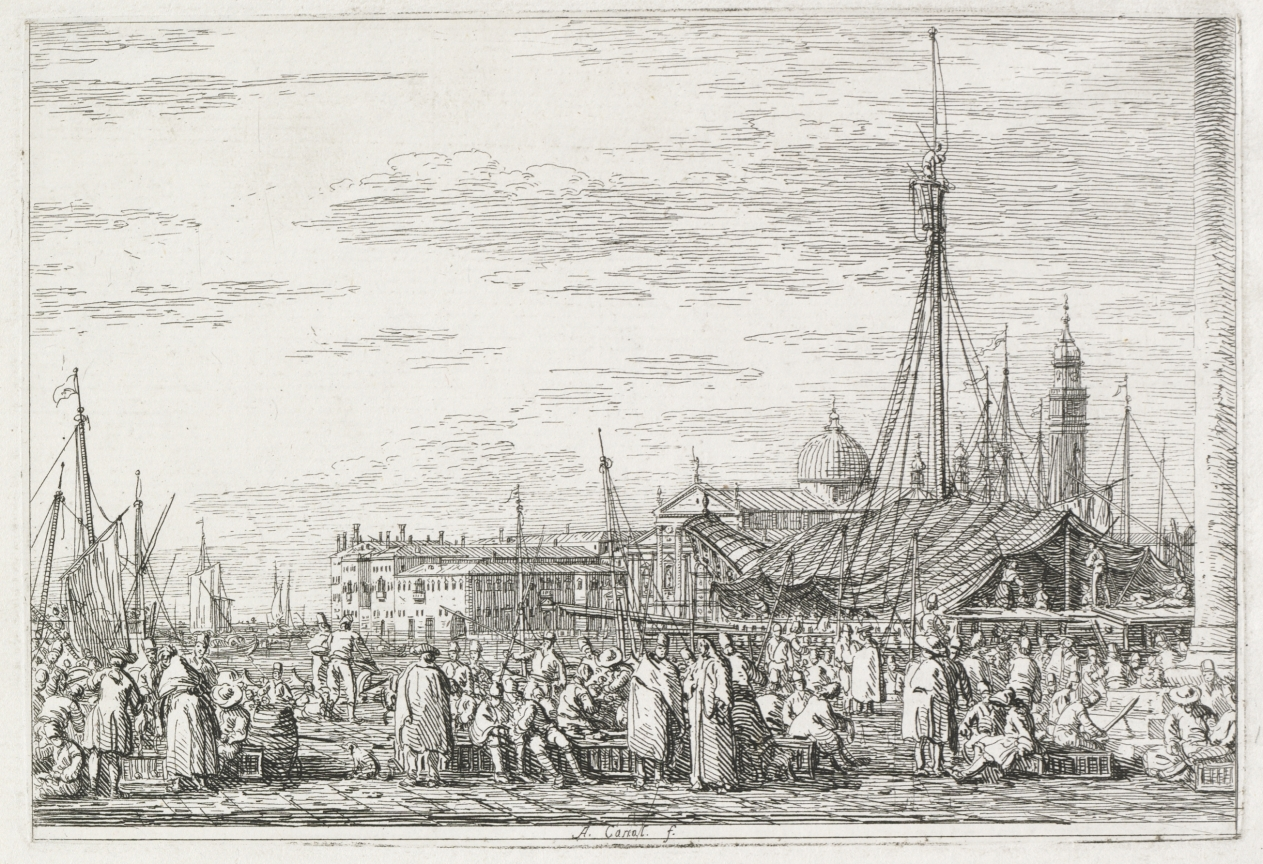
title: Views: The Market on the Molo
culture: Italy, Venice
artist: Antonio Canaletto (Italian, 1697–1768)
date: 1735–1746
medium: etching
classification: Print